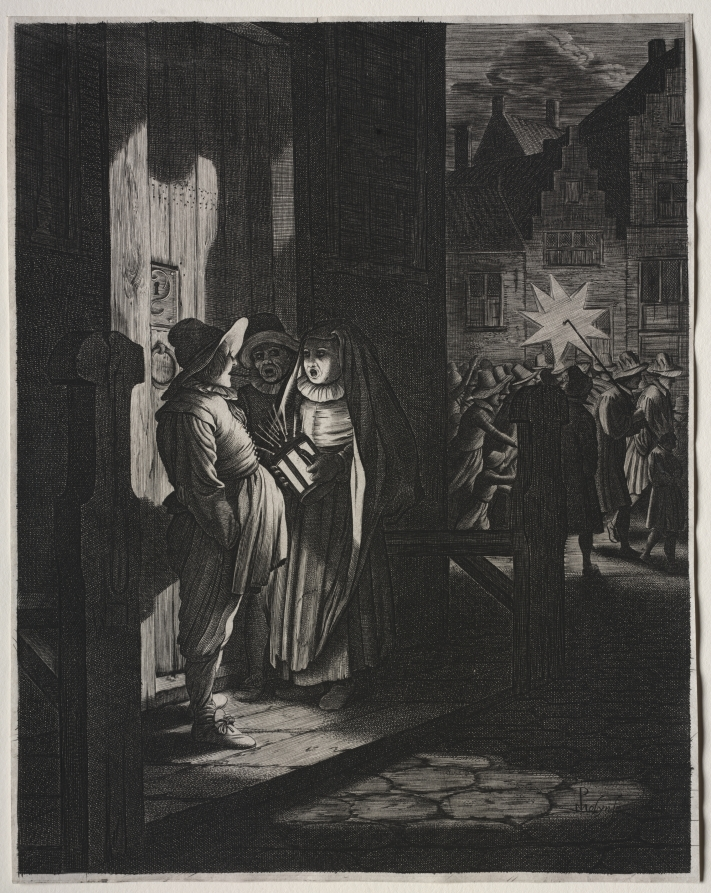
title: Star of Kings, A Night Piece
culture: Netherlands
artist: Jan van de Velde (Dutch, 1620–1662)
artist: after Pieter Molyn (Dutch, 1595–1661)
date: 1630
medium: engraving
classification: Print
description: Star of Kings depicts the holiday of Epiphany, or Twelfth Night, celebrated on January 6, and commemorates the journey of the three Maji to the Christ child, guided by the Star of Bethlehem. In 17th-century Netherlands, the event was recreated by townspeople who gathered at dusk and processed through the streets singing and carrying candles and torches, following one of the most prominent citizens who had the honor of holding the star.